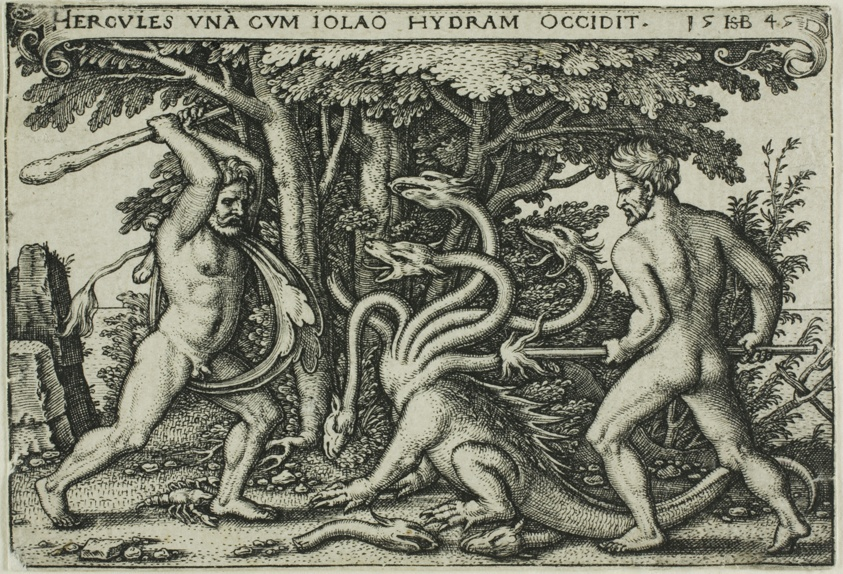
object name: Print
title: Hercules and the Hydra, from The Labors of Hercules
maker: Sebald Beham; German, 1500-1550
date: 1545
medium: Engraving in black on ivory laid paper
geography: Germany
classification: engraving; print; prints and drawing